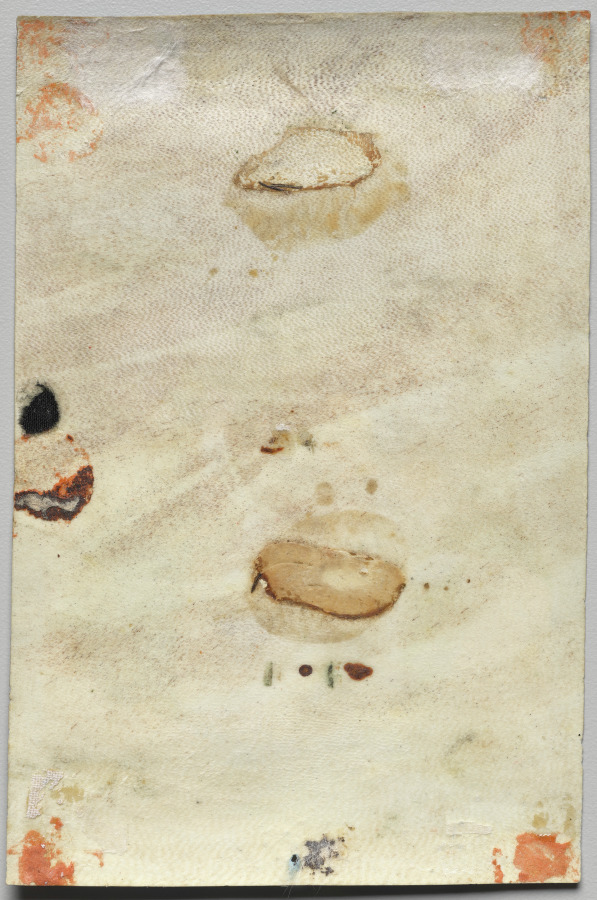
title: Single Leaf from a Book of Hours: Pieta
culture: Italy, Verona(?), 15th century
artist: attributed to Francesco dai Libri (Italian, 1452–1506)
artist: after Andrea Mantegna (Italian, about 1431–1506)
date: c. 1475–85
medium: tempera and gold on vellum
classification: Manuscript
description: One section of a book of hours is known as the Prayers to the Virgin. Dedicated to the Virgin Mary, this group of prayers is written in the first person singular, which allowed readers to insert themselves into the prayer. A reader would begin by calling upon the Virgin Mary and Saint John, with whom they would plead, as saints were considered intercessors who could emphasize a supplicant’s faithfulness. Plaintive or urgent in tone, these prayers are considered some of the most moving texts in books of hours. To accompany them, illuminations often show the Virgin and Child or the Pietà, the Virgin cradling the dead body of Jesus after its removal from the cross.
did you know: All books of hours contain the same basic sections, the order of which can shift, and individual prayers can vary, sometimes significantly, from region to region.